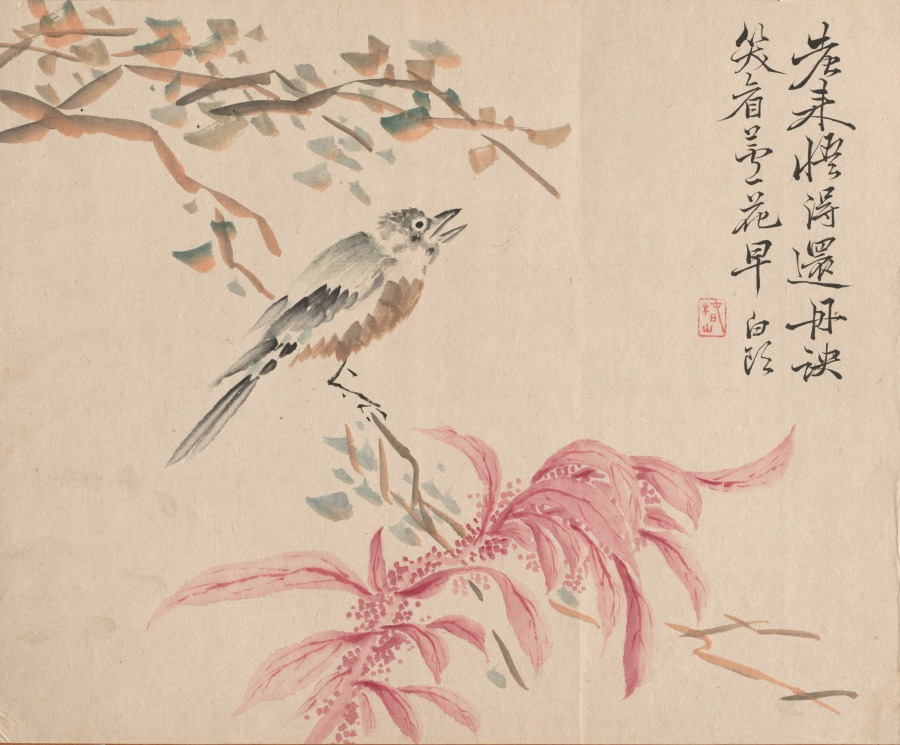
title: Strawberry Spinach and Nightingale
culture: Japan, Edo period (1615–1868)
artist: Tsubaki Chinzan (Japanese, 1801–1854)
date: c. 1845–54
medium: Ink and color on paper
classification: Drawing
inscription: Inscription at upper right.